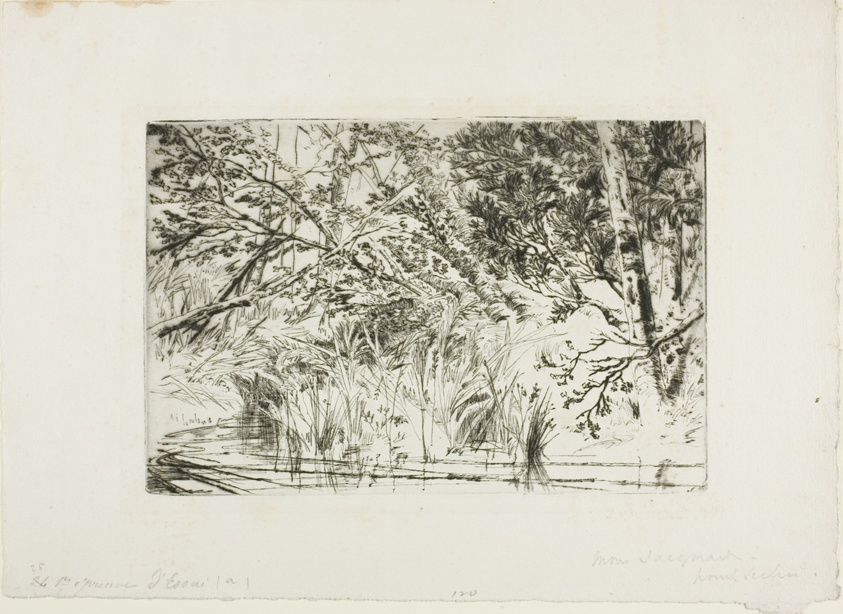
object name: Print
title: Mouth of a Brook, No. II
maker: Francis Seymour Haden (English, 1818-1910)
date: c. 1859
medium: Drypoint on ivory laid paper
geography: England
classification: etching; print; prints and drawing